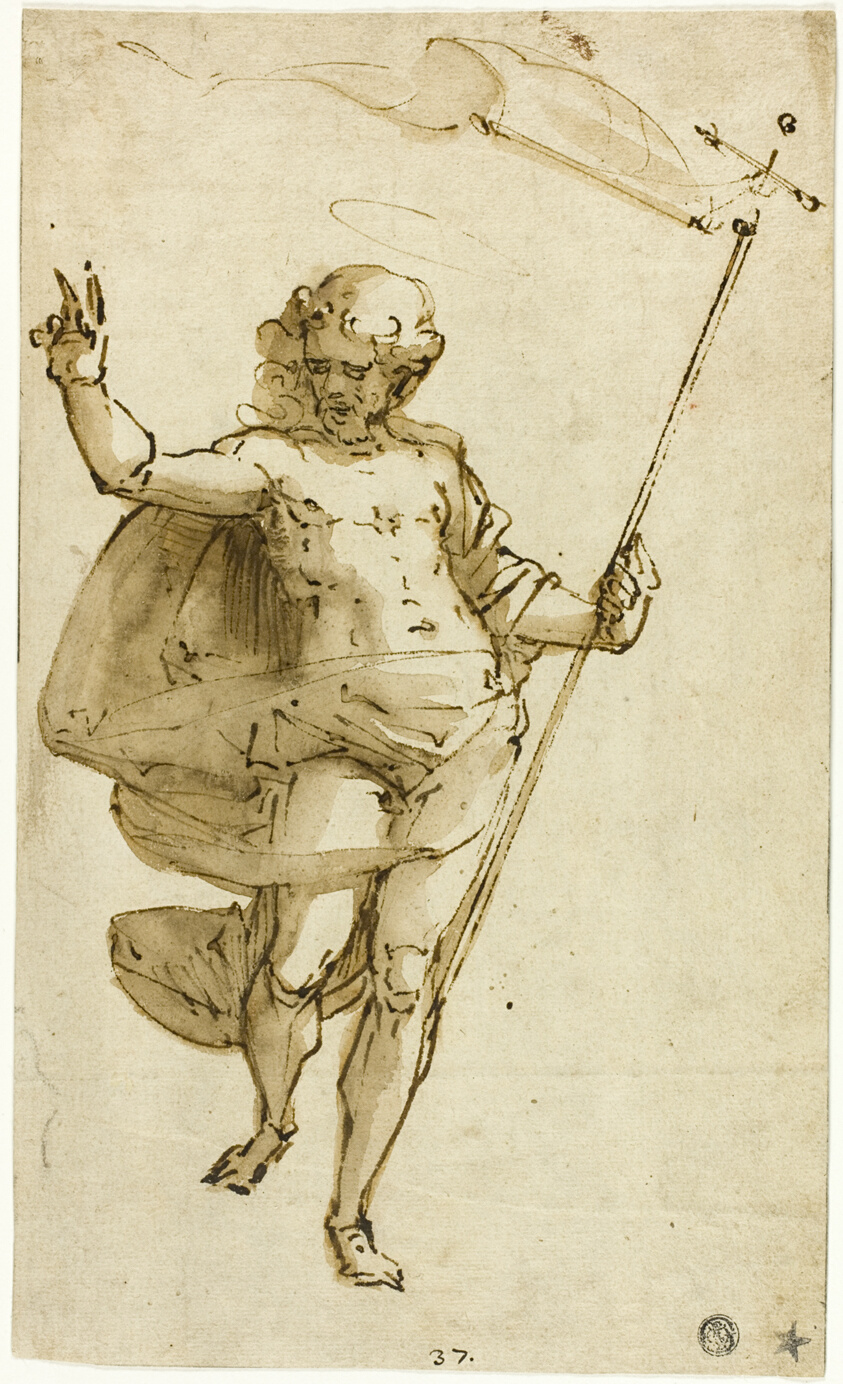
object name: Drawing and Watercolor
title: Resurrected Christ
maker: Luca Cambiaso (Italian, 1527-1585)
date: c. 1559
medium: Pen and brown ink and brush and brown wash, on tan laid paper, laid down on cream laid paper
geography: Italy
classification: pen and ink drawings; drawings (visual works); prints and drawing